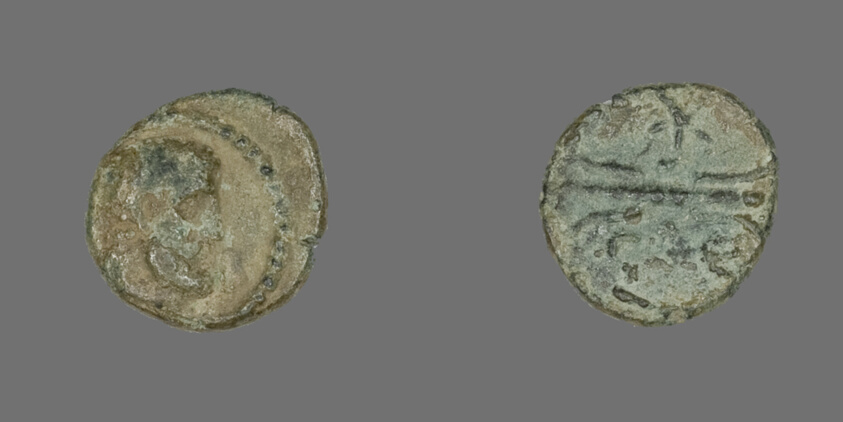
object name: Coin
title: Coin Depicting the Hero Hercules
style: roman (ancient, style or period)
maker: Roman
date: 2nd-1st century BCE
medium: Bronze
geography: Roman Empire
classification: coin; ancient art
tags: gods (deities), Heracles